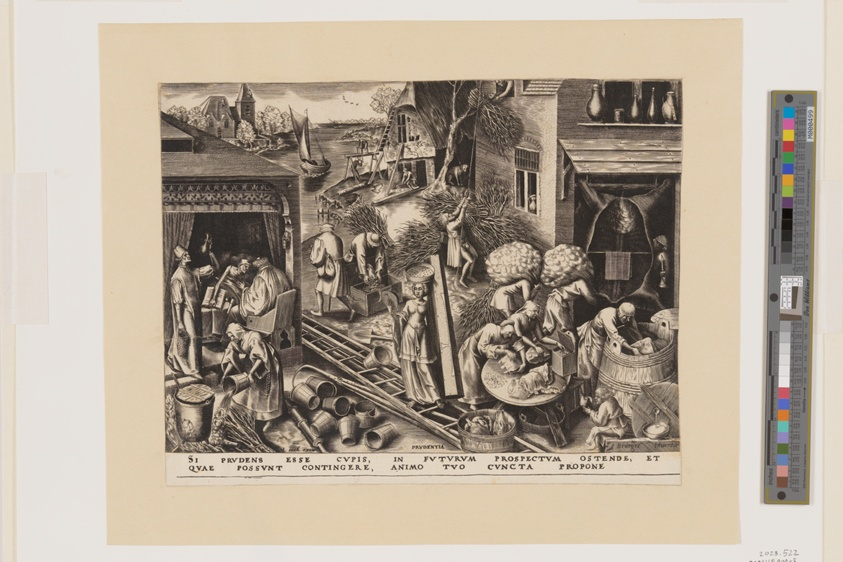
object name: Print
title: Prudence, from The Seven Virtues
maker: Philip Galle (Flemish, 1537–1612); after Pieter Bruegel, the elder (Flemish, c. 1525–1569); published by Hieronymus Cock (Netherlandish, c. 1510–1570)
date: 1559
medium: Engraving on ivory laid paper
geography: Flanders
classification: engraving; paper; print; prints and drawing